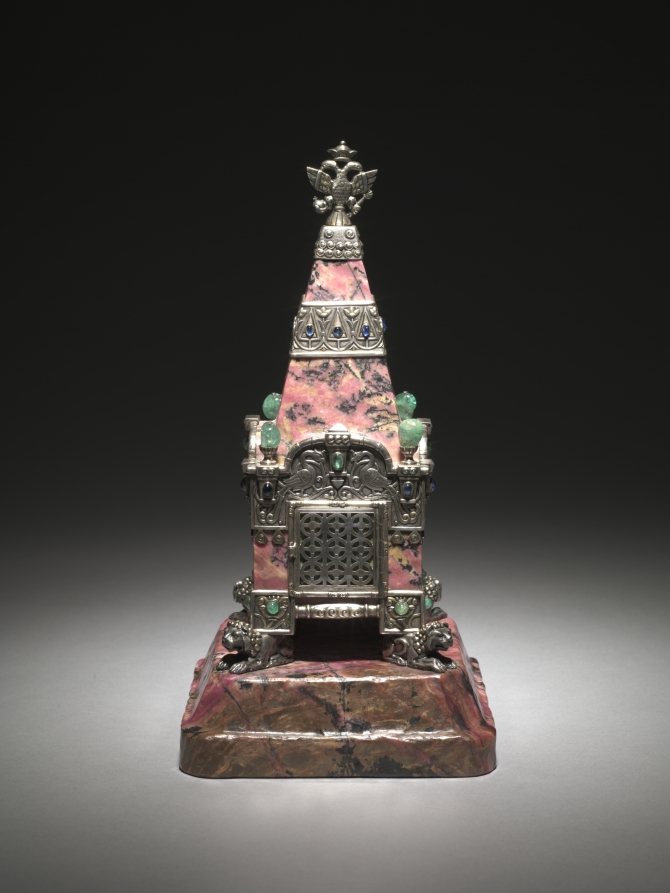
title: Kremlin Tower Clock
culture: Russia, St. Petersburg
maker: House of Fabergé (Russian, 1842–1918)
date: c. 1913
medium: rhodonite, silver, enamel, emeralds, sapphires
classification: Timepiece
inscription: 84, Kokoshnik, delta [assay mark for Moscow, 1908-26]; 91, Kokoshnik; 91; Kokoshnik; C. Fabergé (in Cyrillic); double-headed eagle [imperial warrant]; 16419 k? scratched.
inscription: Painted on clock face: Le Gruet (in script); strike, silence, set hand work (in English).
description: The use of Russian hardstones in creating precious objects became a hallmark of design from the House of Fabergé. Easily carved, these minerals were sourced largely from the western region surrounding the Ural Mountains. Fabergé's workmasters used colorful stones such as agate, nephrite (jade), lapis lazuli, rock crystal, and rhodonite, seen here in this elaborate table or mantel clock, to create all manner of luxurious accessories. Bright pink rhodonite was among the rarest, and consequently most expensive, specimens used by the House of Fabergé. This clock resembles the Taynitskaya Tower, the middle tower on the south side of the Kremlin. The House of Fabergé created this work to commemorate the 300th anniversary of the Romanov dynasty, representing Fabergé's ability to balance the functionality of objects with intricate decorative design.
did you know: The Kremlin tower, which this clock resembles, has a secret well and an underground tunnel that leads to the Moscow River.